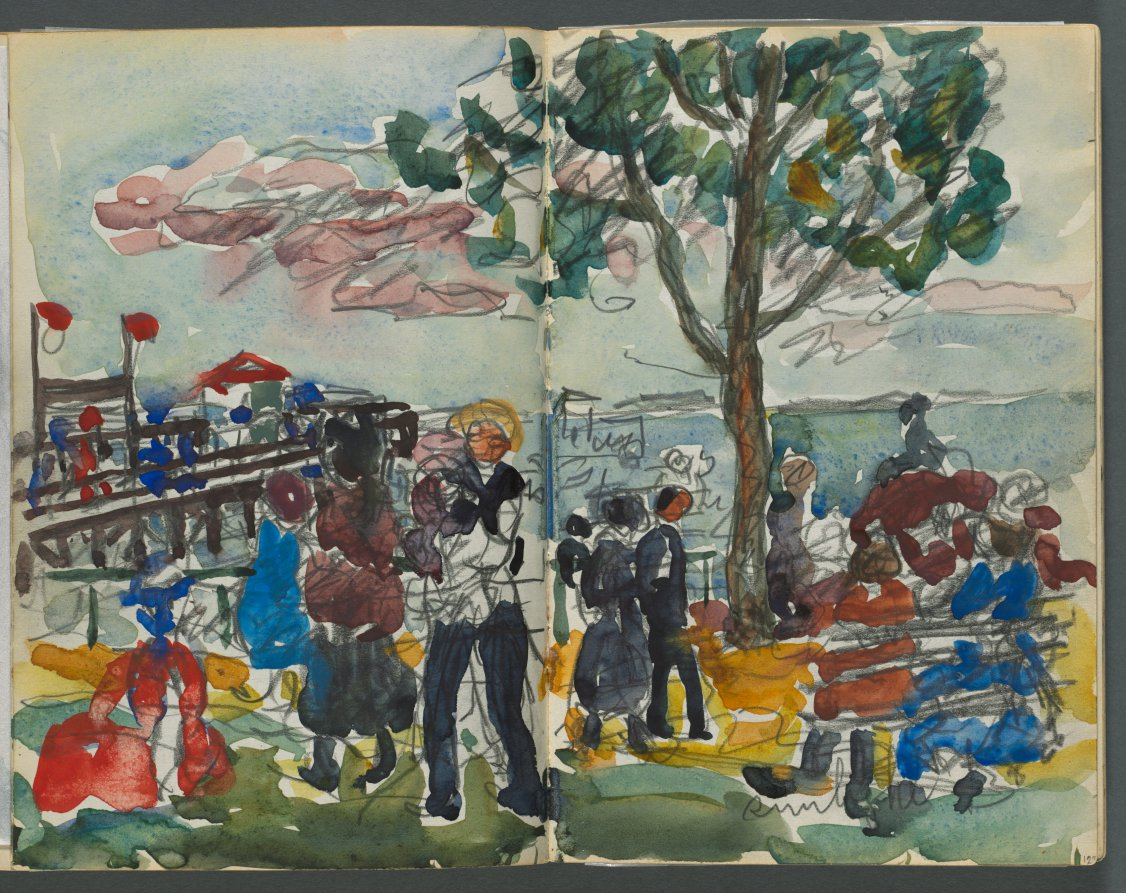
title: Sketchbook, The Dells, N° 127, page 122 & 123: Figures on a Coast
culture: America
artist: Maurice Prendergast (American, born Newfoundland [now Canada], 1858–1924)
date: c. 1919–1921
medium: graphite and watercolor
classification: Bound Volume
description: This sketchbook contains 59 pages of graphite drawings and 16 watercolors made at various locations on Cape Ann, Massachusetts.